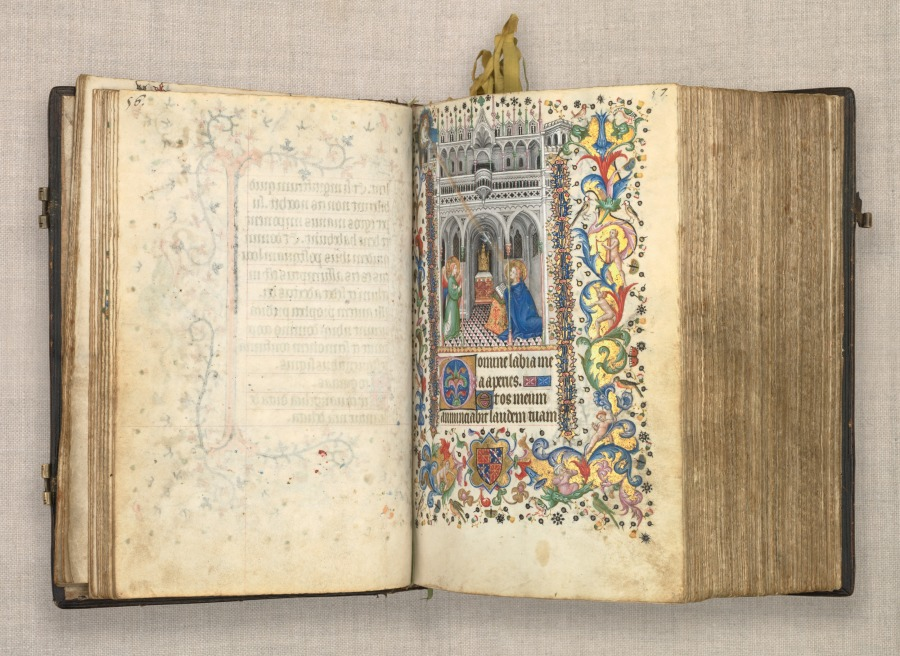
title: Hours of Charles the Noble, King of Navarre (1361-1425): fol. 28v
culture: France, Paris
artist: Master of the Brussels Initials and Associates (French)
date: c. 1405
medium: ink, tempera, and gold on vellum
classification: Bound Volume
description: This precious volume was obviously highly prized by its owner, the French-born King of Navarre, who had his coat of arms painted on no less than twenty folios. Rather than directly commissioning this manuscript from a specific workshop, it seems that Charles the Noble acquired his book of hours -- perhaps ready-made for the luxury market -- while on a trip to Paris in 1404-05. A collaborative effort, six painting styles are evidenced within the pages of this codex, those of two Italians, two Frenchmen, and two Netherlanders. The painter who was responsible for the planning and decoration of the book, and who produced seventeen of the large miniatures, was a Bolognese artist known as the Master of the Brussels Initials. His principal assistant, responsible for most of the borders, was a Florentine who signed his name "Zecho" da Firenze on folio 208 verso.